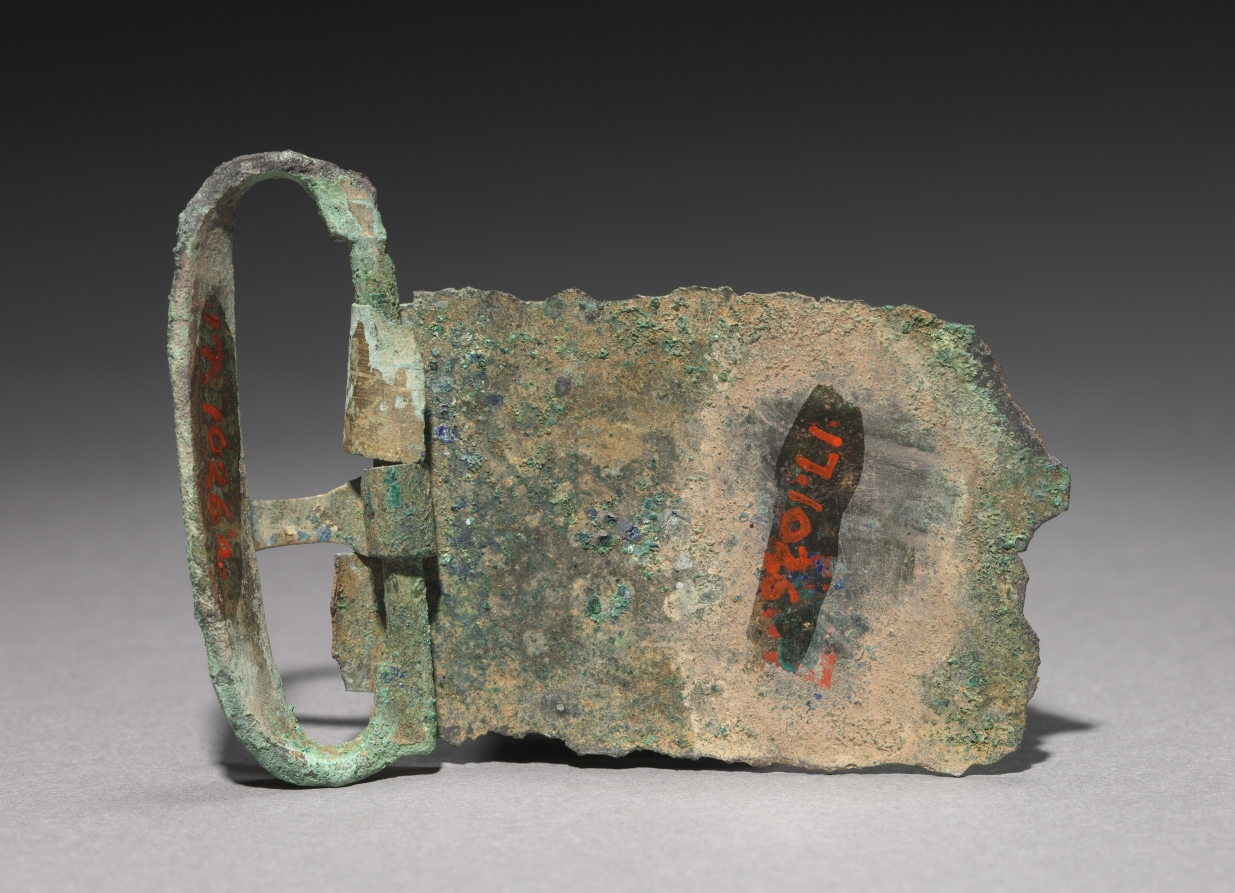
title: Belt Buckle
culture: Korea, Goryeo dynasty (918–1392)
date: 1100s-1200s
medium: bronze gilt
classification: Metalwork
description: Metallurgy advanced remarkably in the Goryeo period (918–1392), explaining why a large quantity of sophisticated metal artifacts with delicate designs were used not only as daily accessories but also as burial goods. Belt buckles like this one gilded with gold were fixed to leather belts.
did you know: The Japanese antique dealer Yamanaka & Company, which opened its branches in New York (1895) and Boston (1899), sold small Korean archaeological materials such as this belt buckle to American collectors in the early 20th century.